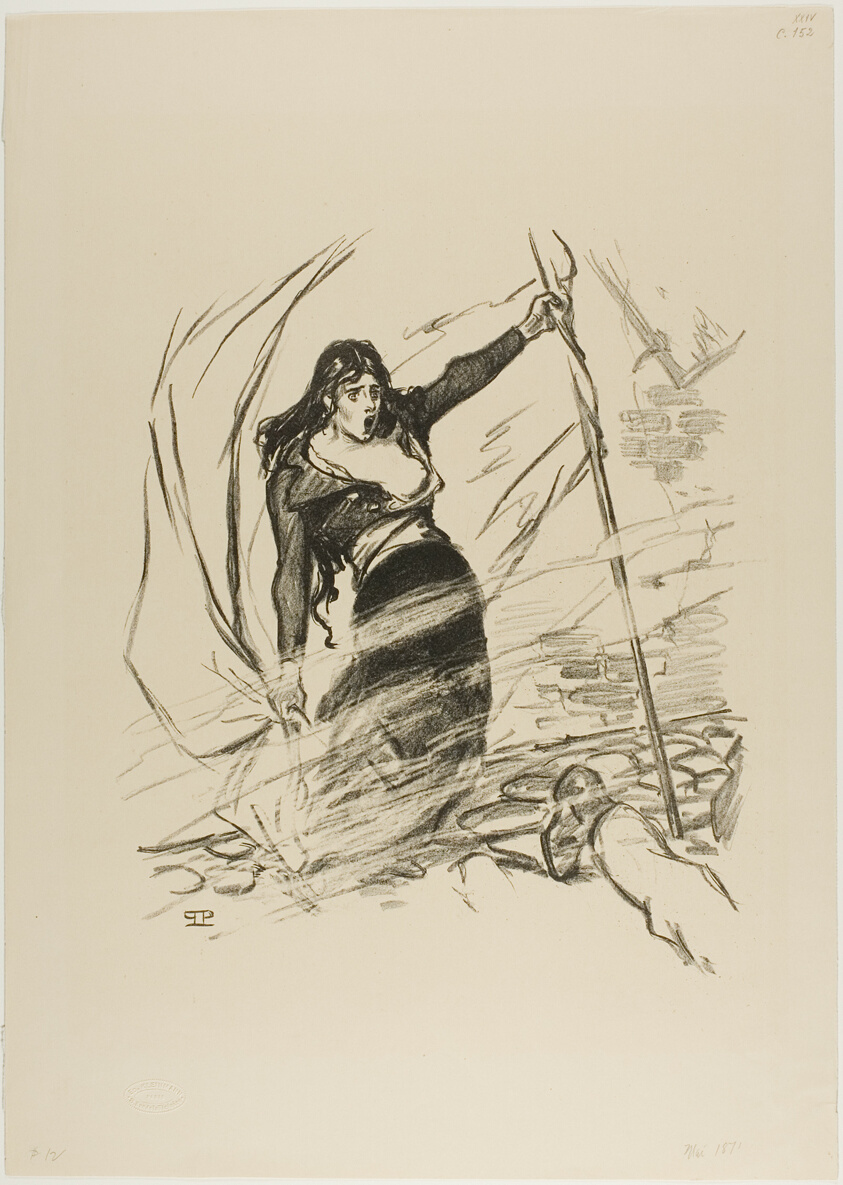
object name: Print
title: May 1871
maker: Théophile-Alexandre Steinlen; French, born Switzerland, 1859-1923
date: May 1894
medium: Lithograph in black on cream wove paper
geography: France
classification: lithograph; print; prints and drawing